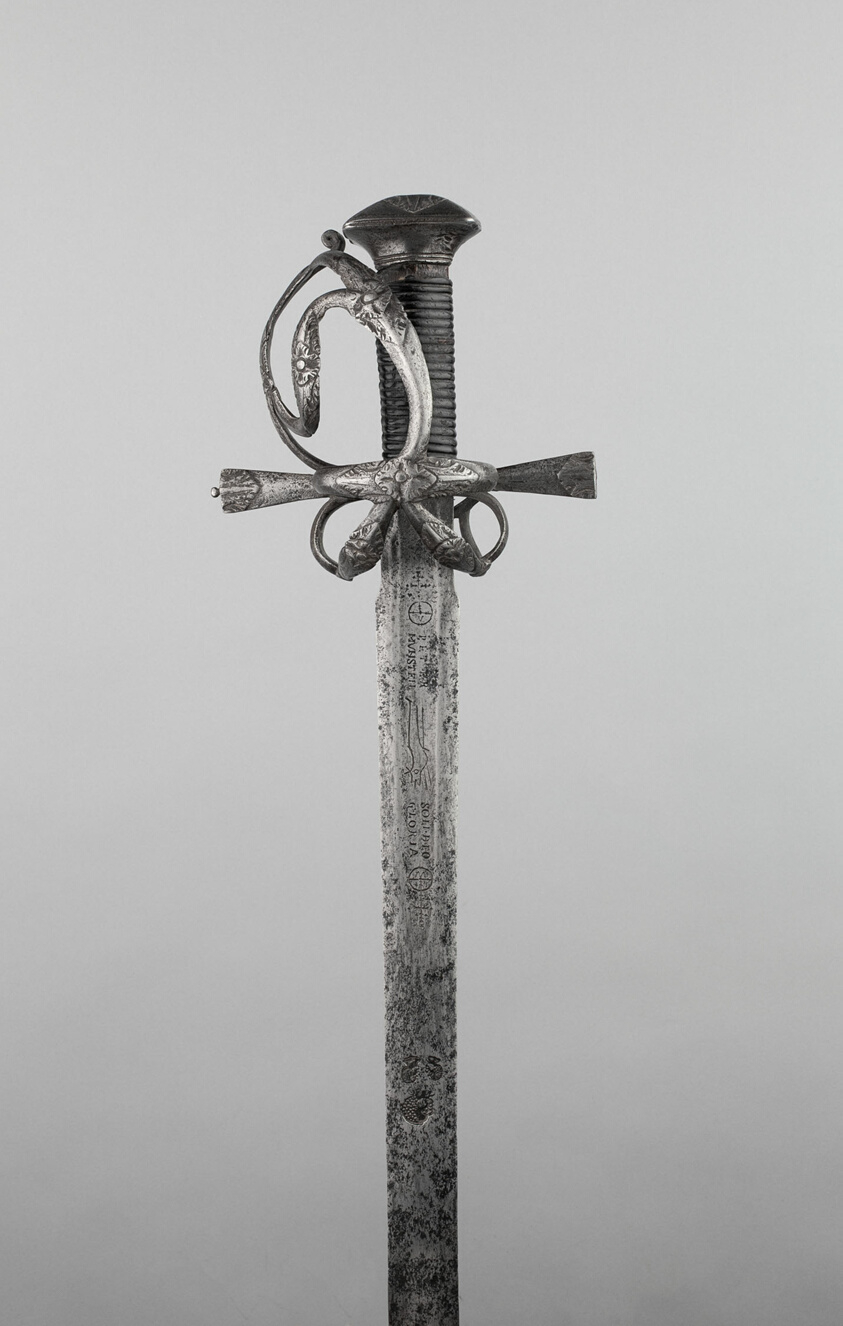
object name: Arms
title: Broadsword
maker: Hilt: German; Blade: Peter Munsten the Elder (?); German, Solingen, active 1591-1627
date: c. 1560/1600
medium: Iron, steel, leather, and cord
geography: Solingen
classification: edged weapon-sword; arms; arms and armor